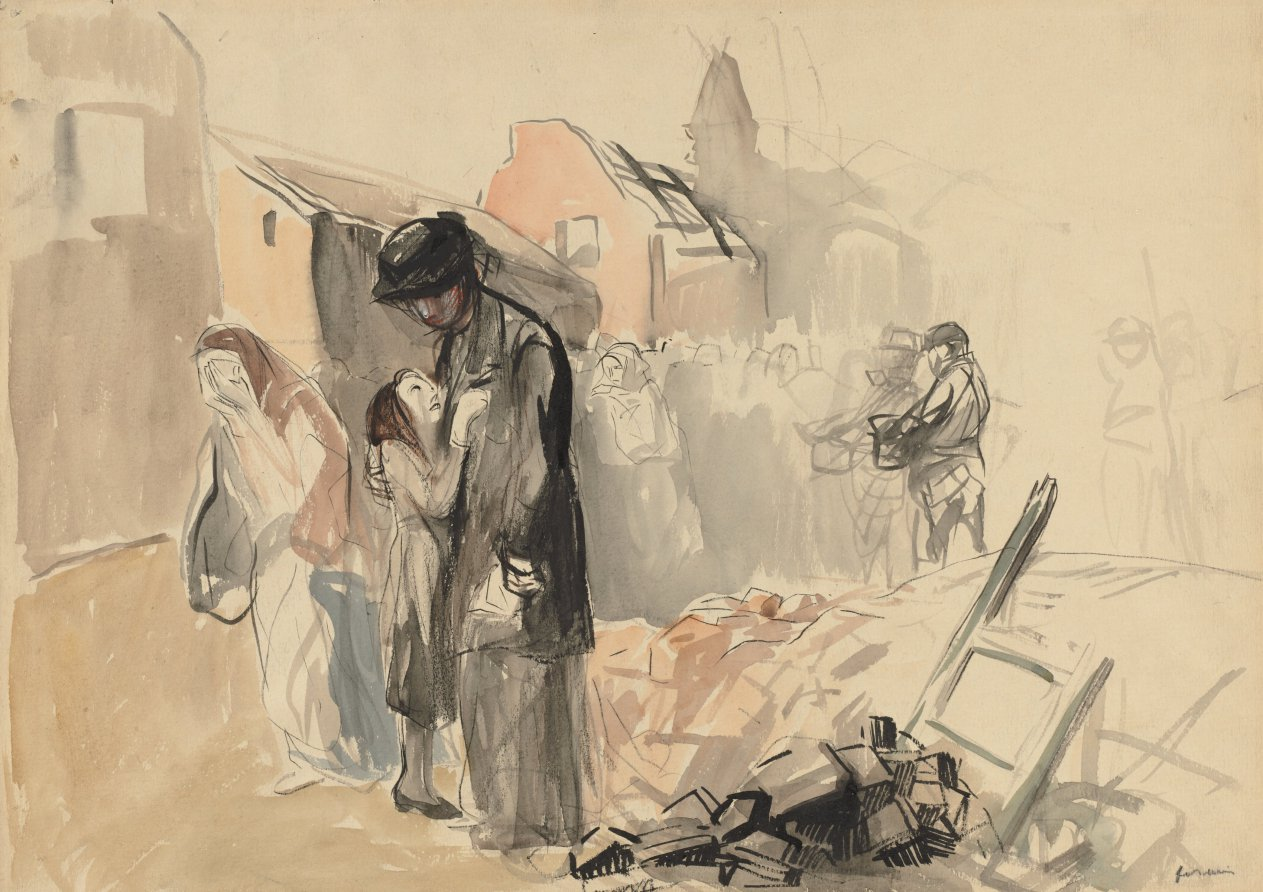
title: Reconquered Territory (recto)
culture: France, 20th century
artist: Jean Louis Forain (French, 1852–1931)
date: c. 1919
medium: black wash and watercolor over black crayon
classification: Drawing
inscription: signed, lower right, in graphite: forain ; lower right, in graphite: A.2165